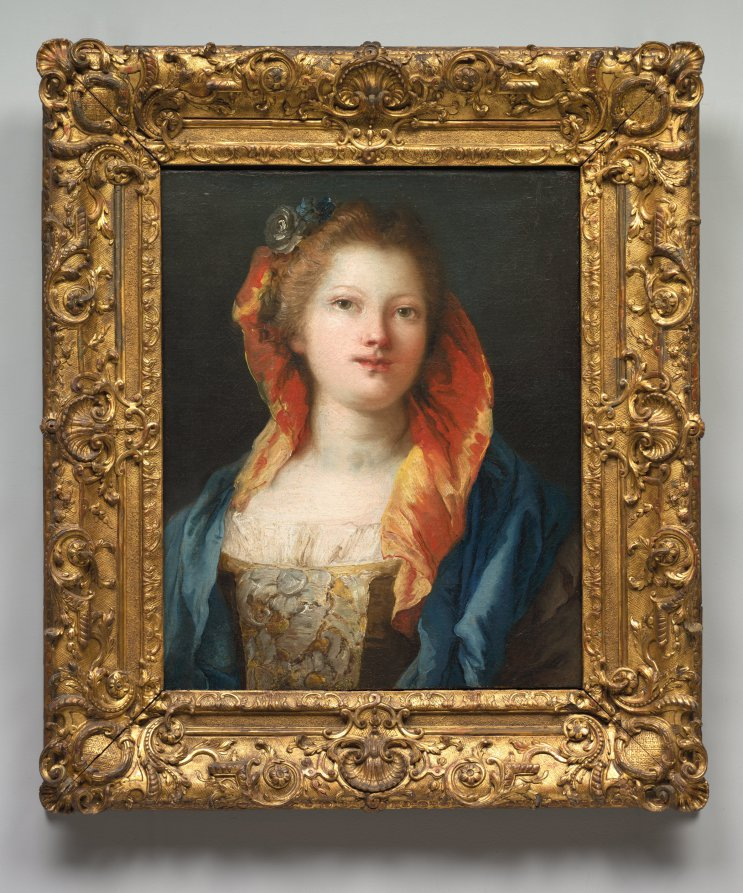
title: Portrait of a Woman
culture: Italy, 18th century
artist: Giovanni Domenico Tiepolo (Italian, 1727–1804)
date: 1762–1770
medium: oil on canvas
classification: Painting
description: This portrait was made in Spain, where the artist (the son of Giambattista Tiepolo, the great Venetian fresco painter) lived between 1762 and 1770.